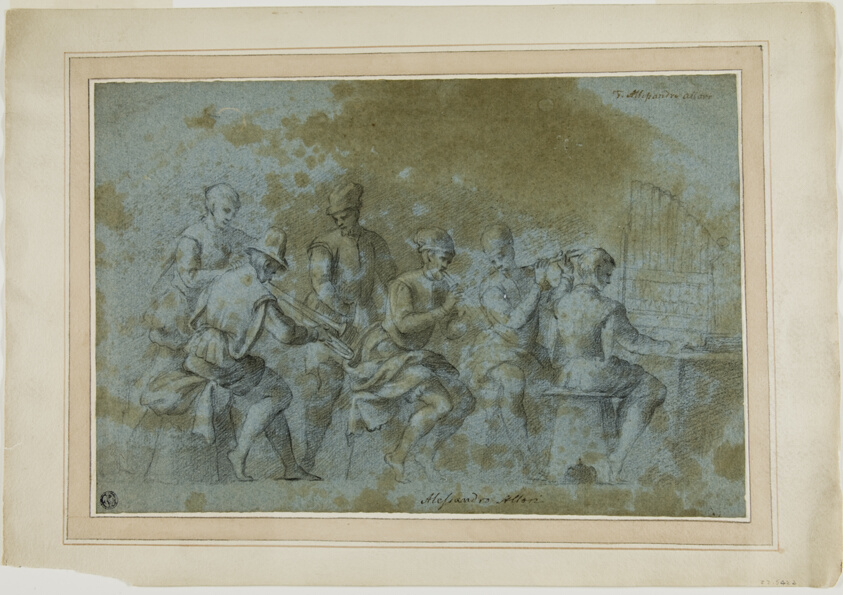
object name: Drawing and Watercolor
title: Concert Scene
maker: Florentine or North Italian; Late 16th Century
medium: Black chalk heightened with touches of white chalk, on blue laid paper, tipped onto cream wove paper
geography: Italy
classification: chalk; drawings (visual works); prints and drawing